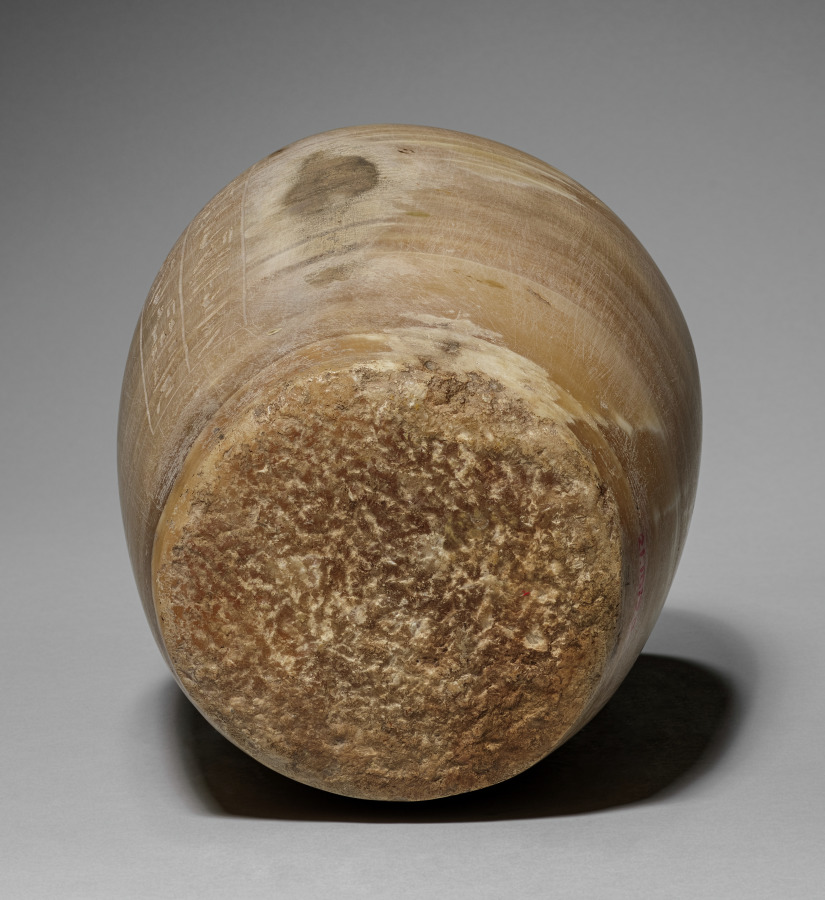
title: Canopic Jar with Man's Head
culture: Egypt, Late period (715–332 BCE), Dynasty 26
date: 664–525 BCE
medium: travertine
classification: Funerary Equipment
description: In the process of mummification, the liver, lungs, stomach, and intestines were removed, separately embalmed, and stored in specialized jars known as canopic jars (after a sailor in Greek mythology, who died at the town of Canopus in the Nile Delta and was worshipped there in the form of a human-headed jar). Each organ was identified with one of four funerary deities collectively known as the Sons of Horus: the liver with Imsety (man's head), the lungs with Hapy (baboon's head), the stomach with Duamutef (jackal's head), and the intestines with Qebehsenuef (falcon's head). It was their duty to protect the deceased and restore to him his body parts in the hereafter.